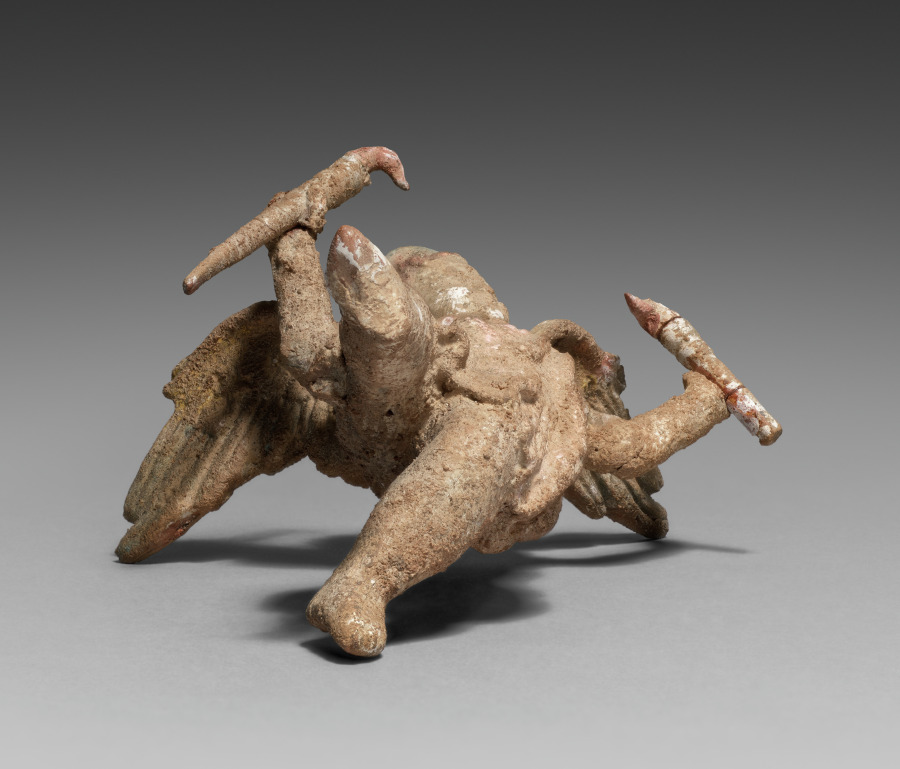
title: Figurine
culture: Greece, Myrina, Hellenistic Period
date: 300–100 BCE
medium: terracotta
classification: Sculpture